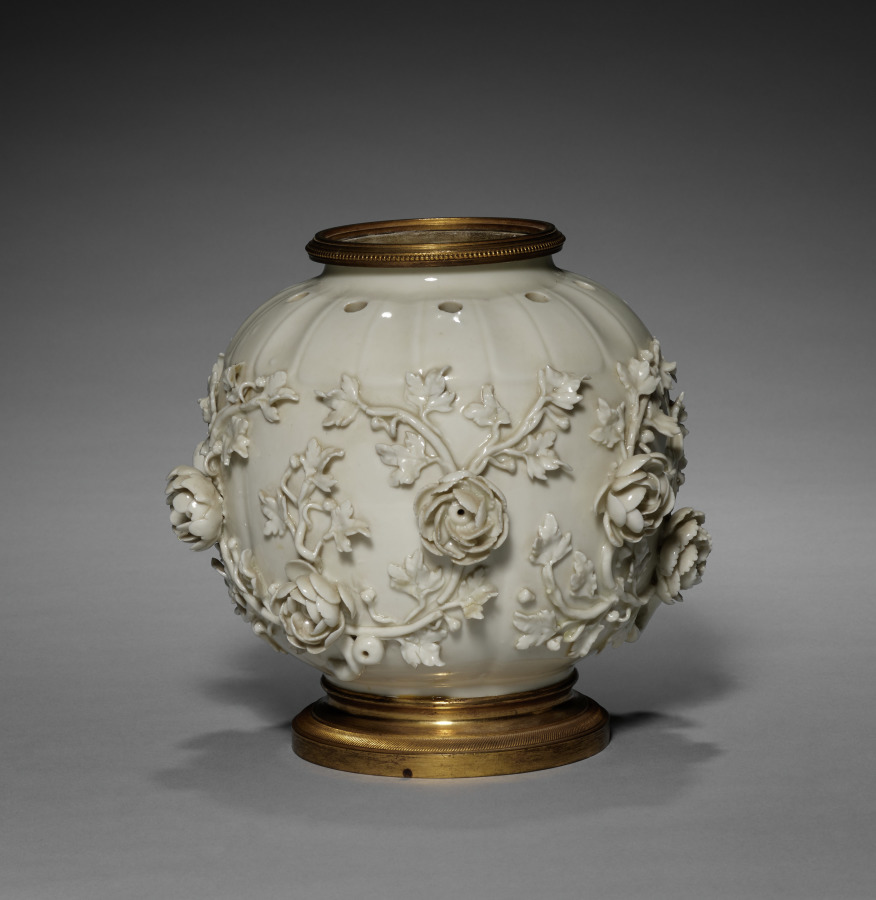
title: Potpourri Vase with Cover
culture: France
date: c. 1860–80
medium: blanc-de-chine porcelain; gilt bronze mount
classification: Ceramic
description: This vase was likely made by the celebrated Parisian ceramics firm of Edmé Samson (1810–91). To cater to the resurgence in taste for 18th-century designs, the Samson firm specialized in making reproductions of rare 18th-century European porcelains, especially those from firms that had already copied Chinese porcelains. In this case, this vase's design is taken from models produced by the Saint-Cloud factory in the 1750s after earlier Qing dynasty Chinese ceramics. However, the telltale sign that this vase is made by Samson and not Saint-Cloud is that the original would have been made from a soft-paste porcelain (fired at a lower temperature), while this example is made of hard-paste porcelain (fired at the highest temperature).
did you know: Potpourri vases always have holes in the top to let the scent of dried spices and flowers contained within freshen the air around them.